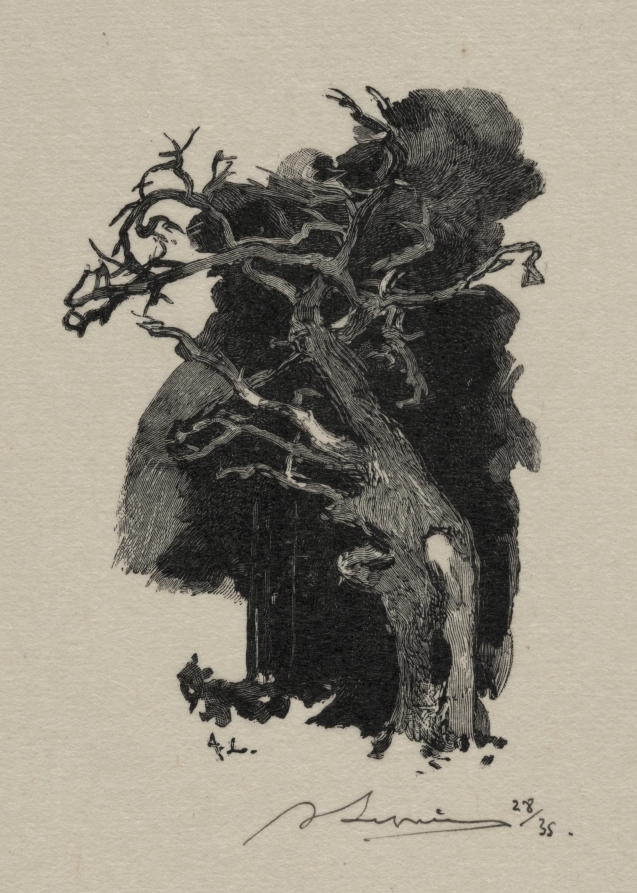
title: Le Rageur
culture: France, 19th-20th century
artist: Auguste Louis Lepère (French, 1849–1918)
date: 1887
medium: wood engraving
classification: Print